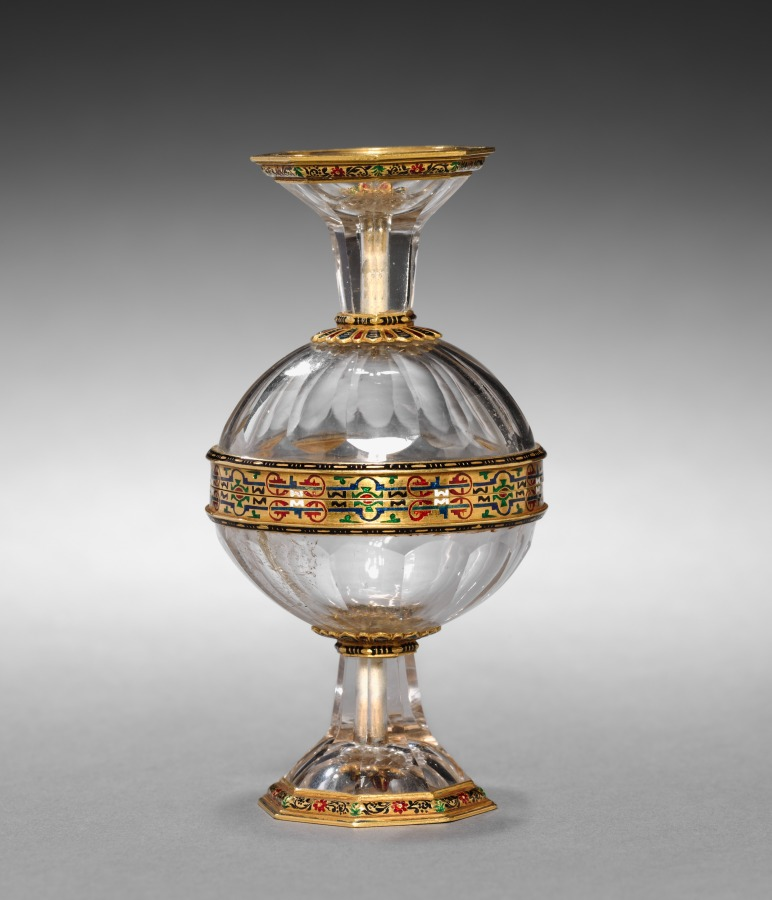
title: Double Cup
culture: Italy, late 16th century (possibly 19th century forgery, or 16th and 19th century pastiche)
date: late 16th century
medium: rock crystal set in enameled gold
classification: Enamel